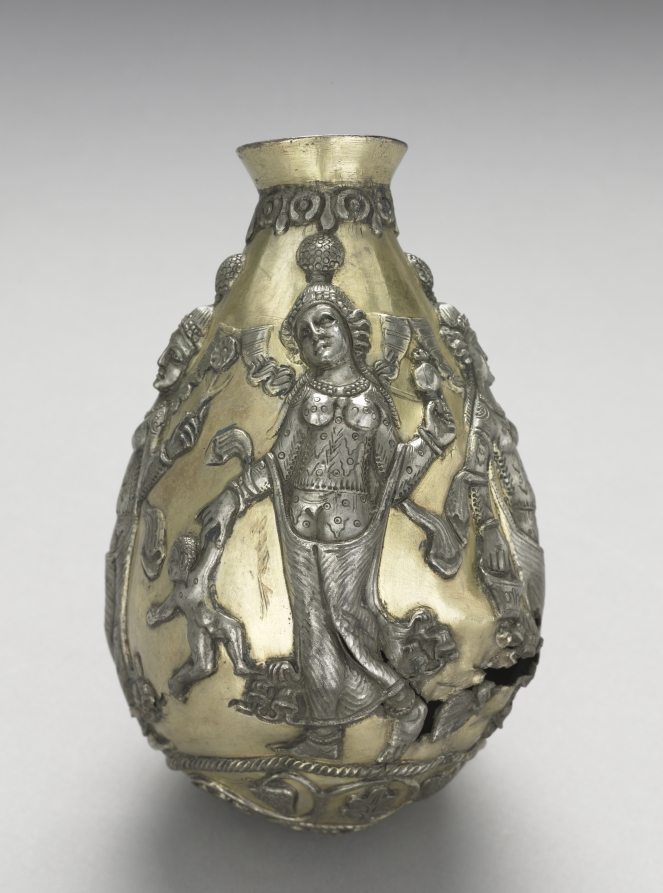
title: Anahita Vessel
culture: Iran, Sasanian Empire (224–651 CE)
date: 300–500 CE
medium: silver, cast, raised, repoussé, chased, and gilted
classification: Metalwork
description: These dancers may be sacred images of the Zoroastrian religion of the Sasanians or they may be bacchantes, followers of a cult of the Roman wine god, Bacchus, who was popular in the Near East.